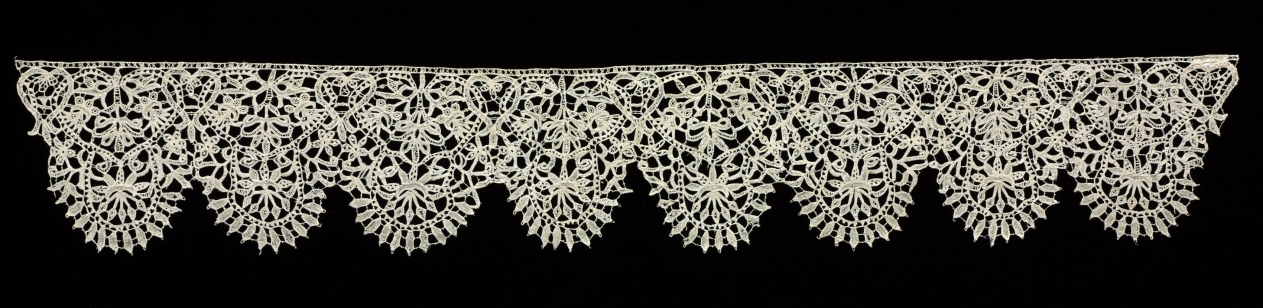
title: Lace Collar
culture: Italy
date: 1600–1640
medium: Needle lace (punto in aria)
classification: Lace